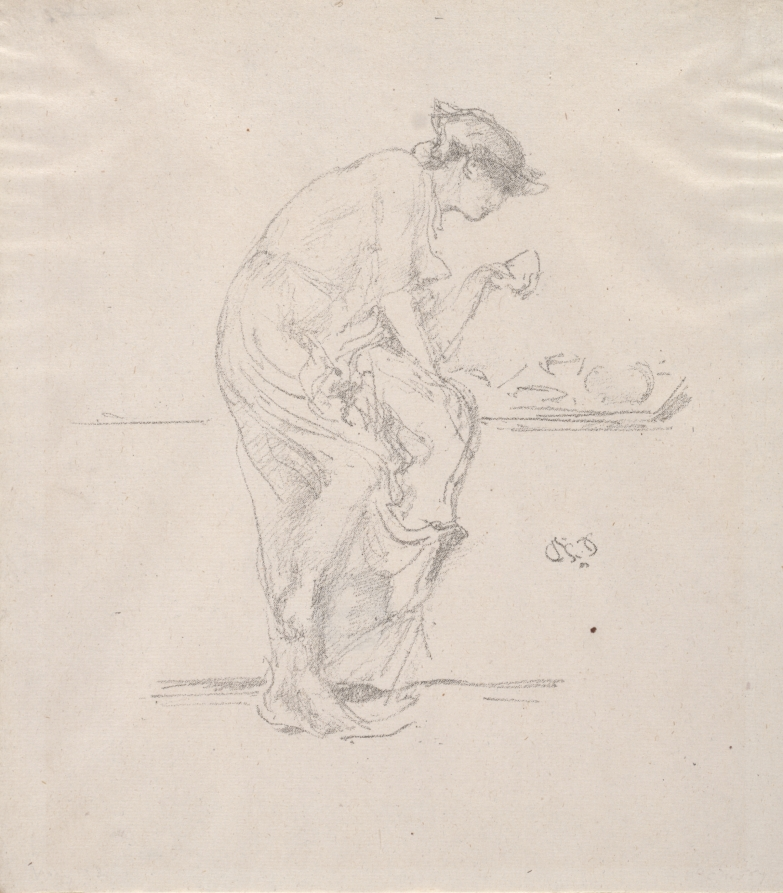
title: The Horoscope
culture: America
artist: James McNeill Whistler (American, 1834–1903)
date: 1890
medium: lithograph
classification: Print